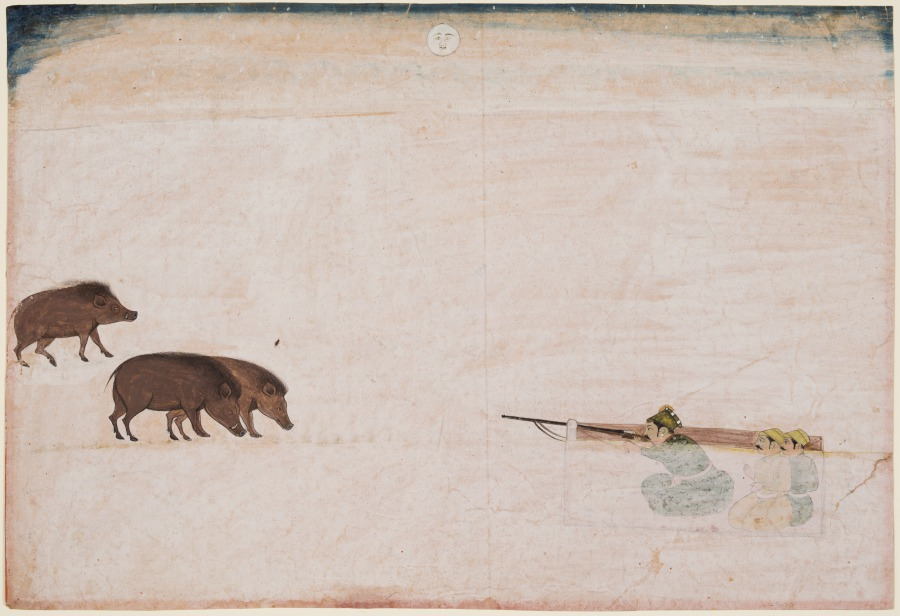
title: Raja Ram Chand of Amber (r. 1667–88) Hunting Wild Boar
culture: Northwestern India, Rajasthan, Rajput Kingdom of Amber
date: c. 1670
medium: gum tempera and gold on paper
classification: Painting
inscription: ṭhākura rāma cada jī kī suratī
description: A Rajput king on a nocturnal hunt points his rifle toward three boars standing amid faint tufts of grass. The raja and his two attendants sit concealed behind a hunting blind, and we see their figures through a thin white screen that blends with the mists and sands in the milky moonlight. The raja, dressed in a green jama (long belted tunic), eyes his quarry intently, nearly ready to fire a bullet, and his attendants anxiously observe.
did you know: The full moon with face evokes the dynasty’s name “Chand” or moon.